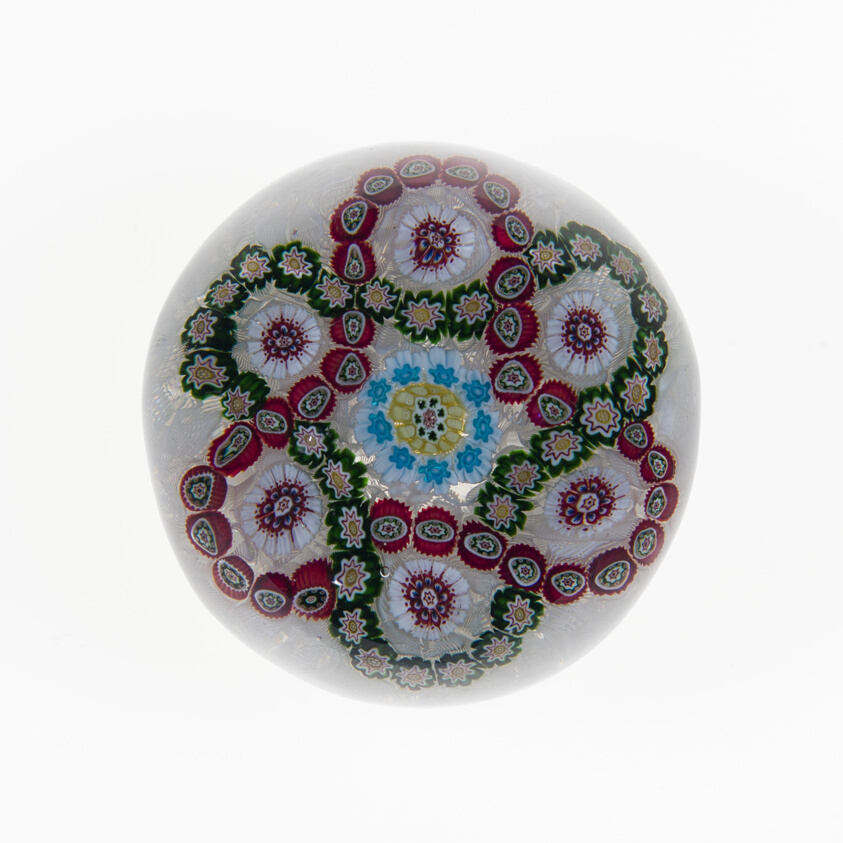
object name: Glass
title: Paperweight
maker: Baccarat Glassworks (Cristalleries de Baccarat); Lorraine, France, founded 1764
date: c. 1846–55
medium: Glass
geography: Lunéville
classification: paperweight; millefiori; european decorative arts; glass